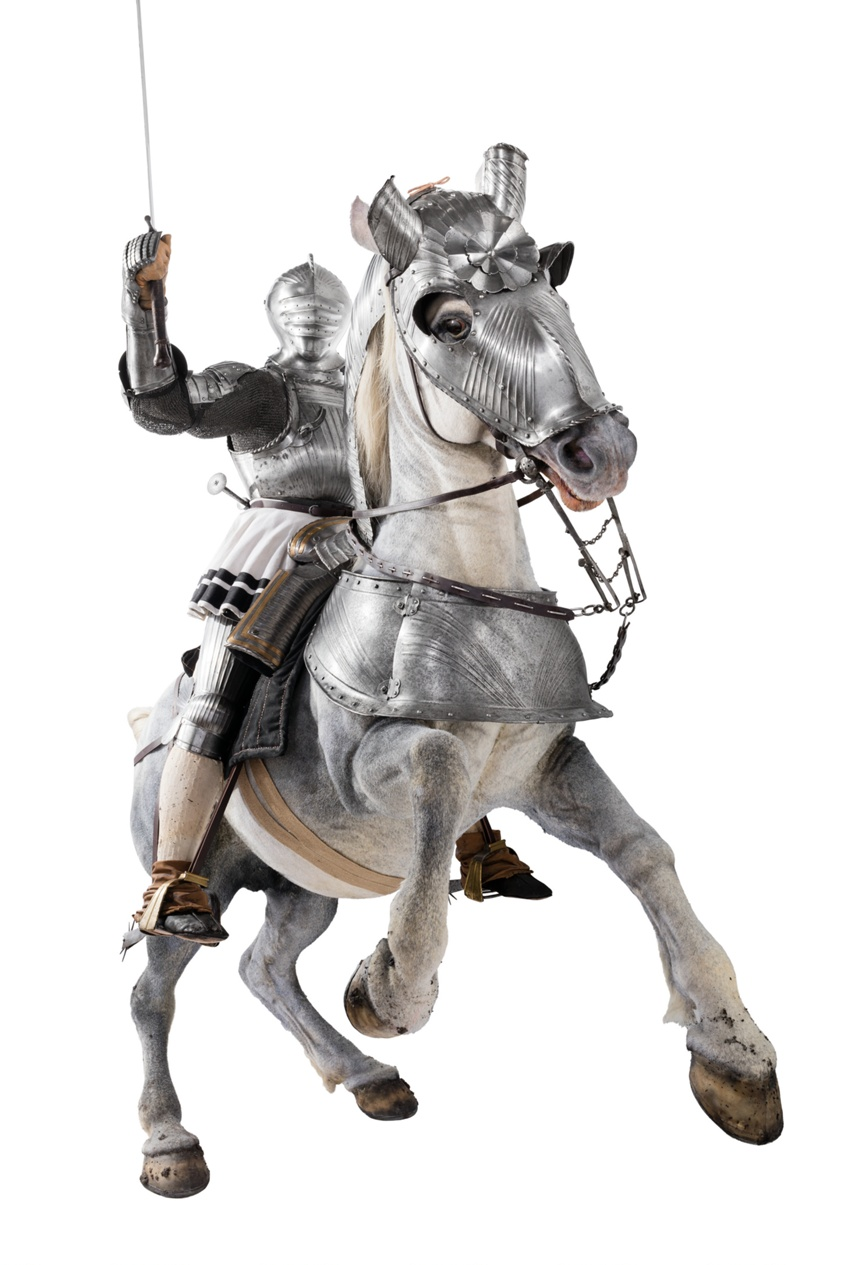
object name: Armor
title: Shaffron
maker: Southern German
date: c. 1520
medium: Steel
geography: Southern Germany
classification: horse equipment; armor; arms and armor